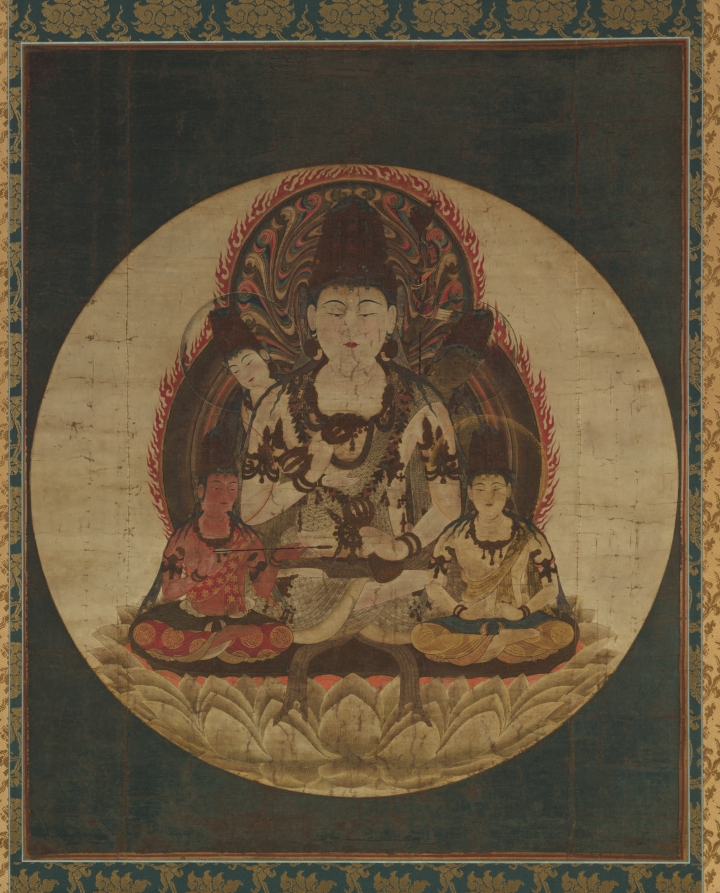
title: The Secret Five Bodhisattvas (Gohimitsu Bosatsu)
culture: Japan, Kamakura period (1185–1333)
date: 1200s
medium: hanging scroll; ink, color, gold, and silver on silk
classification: Painting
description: The Secret Five were used in a Buddhist ritual to convert negative aspects of consciousness into positive ones. At the center is Kongōsatta, who represents the enlightened mind. He is surrounded by enlightened beings who convert the human frailties of desire, sensory pleasure, passion, and pride into constructive tools to use on the path to enlightenment.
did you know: The bodhisattva Kongōsatta wears a crown containing figures of the Five Wisdom Buddhas.